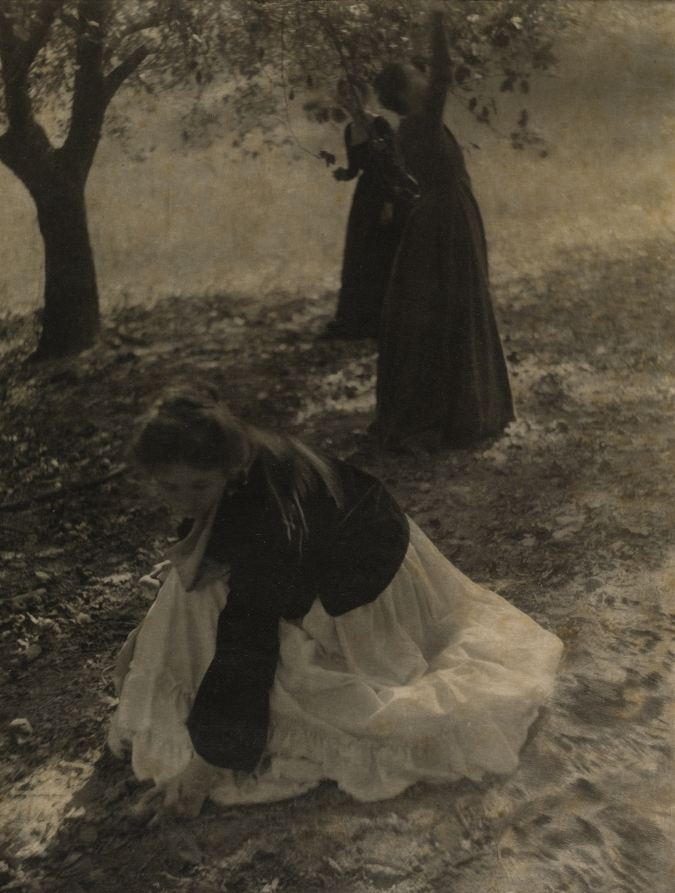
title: The Orchard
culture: America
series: Camera Work, no. 9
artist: Clarence H. White (American, 1871–1925)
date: 1902 (printed 1905)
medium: photogravure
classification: Photograph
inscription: Written in pencil on verso: "33 [circled]"